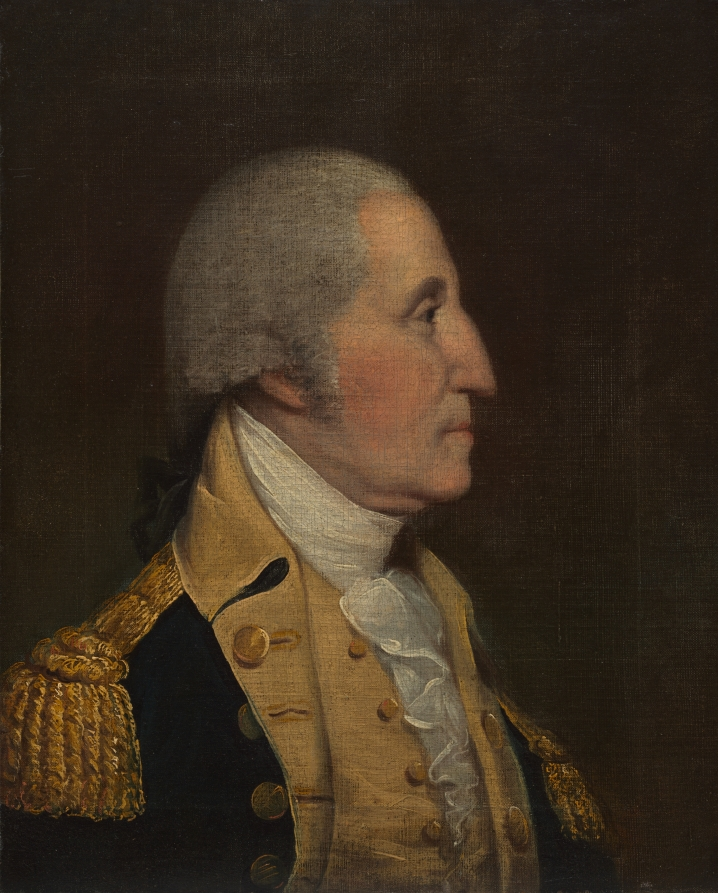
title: George Washington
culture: America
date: c. 1790s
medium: oil on canvas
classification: Painting